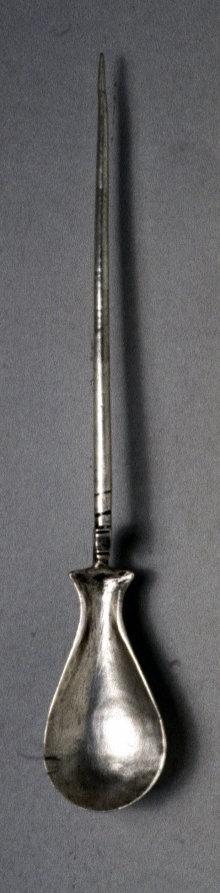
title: Spoon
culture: Byzantium, Syria(?), Byzantine period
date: 300s CE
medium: silver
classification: Metalwork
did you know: The handle of this spoon is delicately detailed with beaded ornament while its handle twists, ending in a sharp point. Timeless in design, this spoon would not seem out of place in a modern table setting.